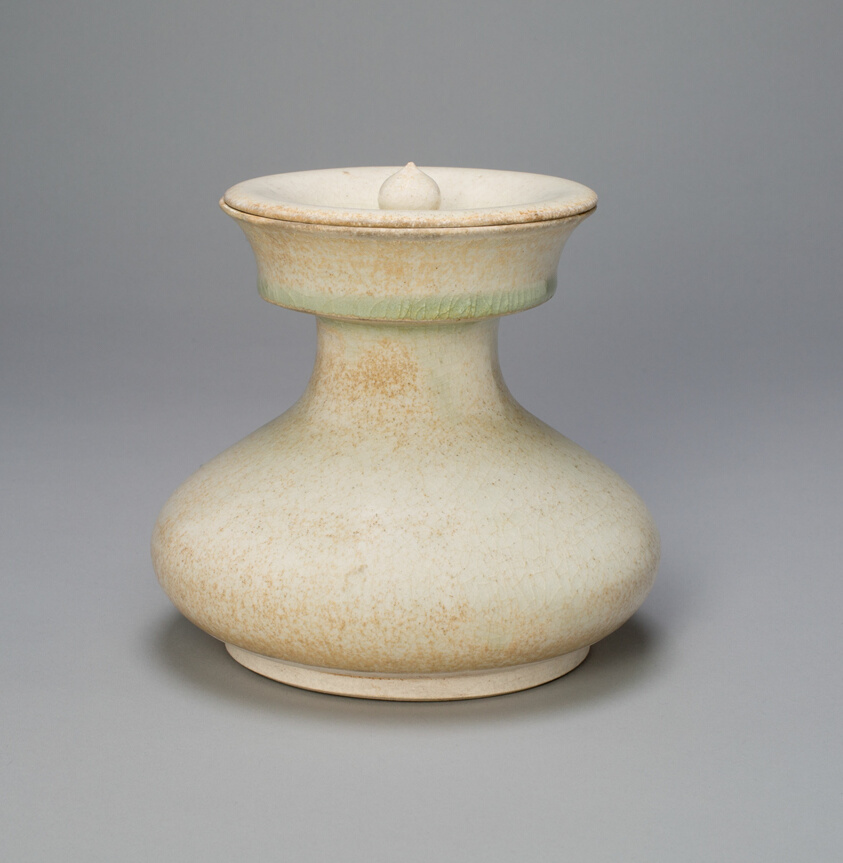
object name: Vessel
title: Broad Pear-Shaped Jar with Concave Lid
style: Chinese (culture or style)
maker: China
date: Tang dynasty (618–907), 8th century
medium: Slip-coated and glazed stoneware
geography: China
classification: stoneware; ceramics; asian art; vessel